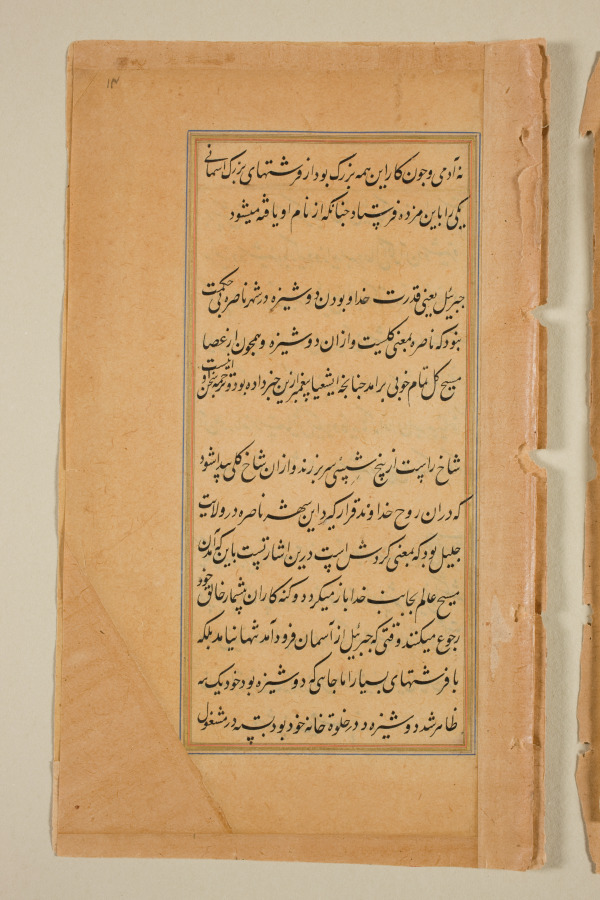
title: Text, folio 14 (recto), from a Mirror of Holiness (Mir’at al-quds) of Father Jerome Xavier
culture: Mughal India, Allahabad, made for Prince Salim (1569–1627)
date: 1602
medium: Ink and gold on paper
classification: Manuscript